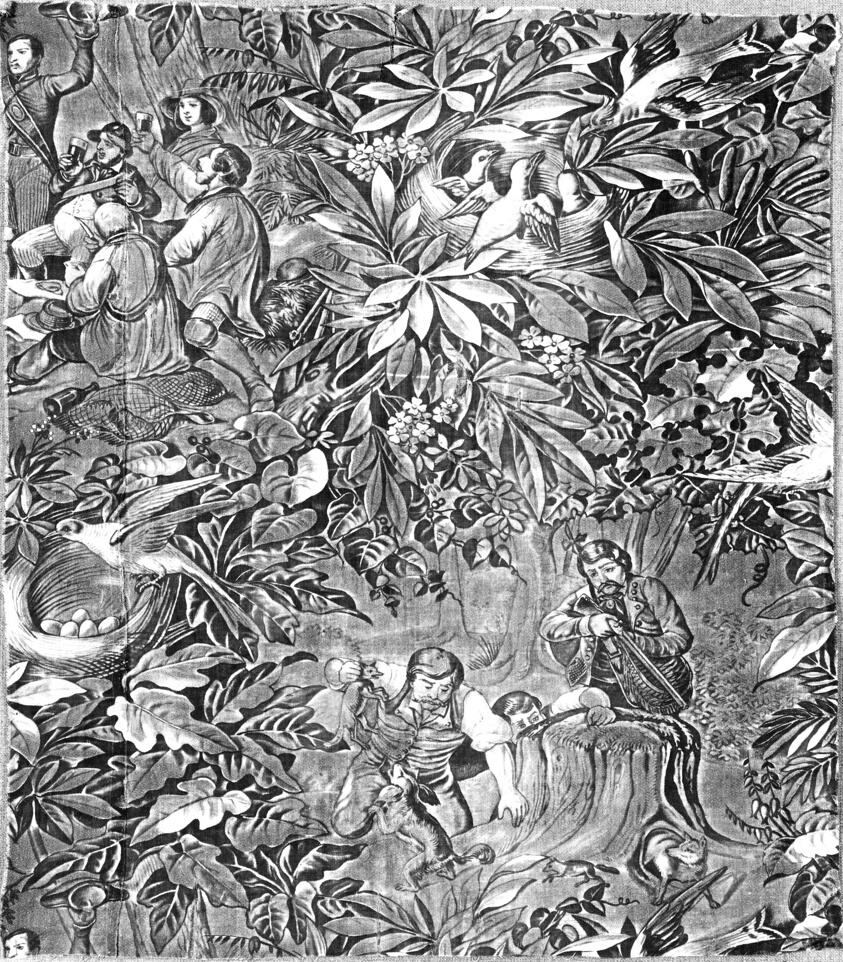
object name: Textile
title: Panel (Furnishing Fabric)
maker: Paul Gavarni (French, 1804-1866); France, Alsace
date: c. 1830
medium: Cotton, plain weave; engraved roller printed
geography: France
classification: textile; weaving - printed; furnishing textile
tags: propaganda